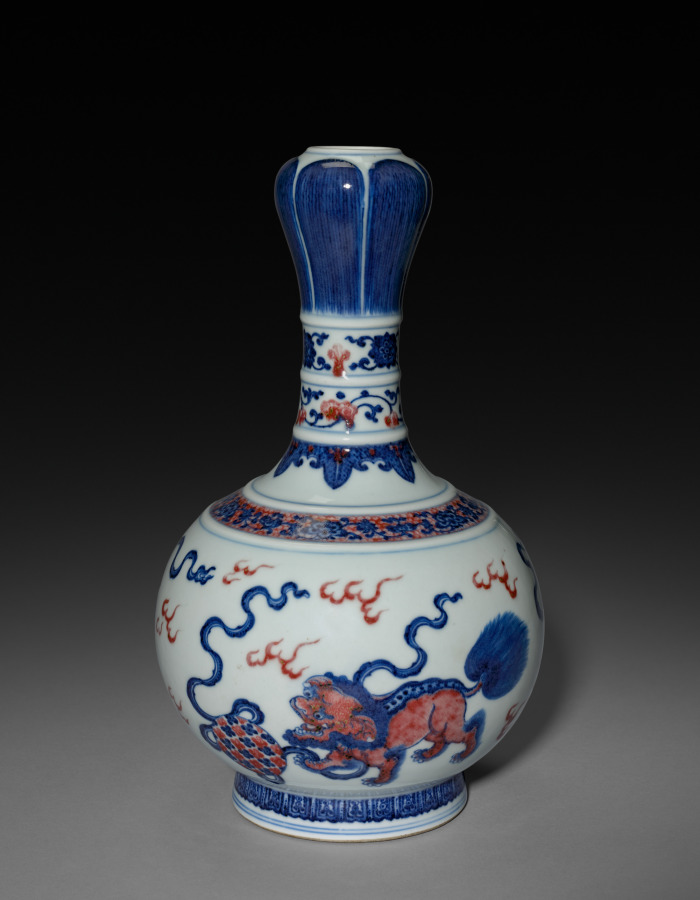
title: Bottle-shaped Vase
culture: China, Qing dynasty (1644–1911), Qianlong reign (1736–95)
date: 1736–95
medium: porcelain with underglaze decoration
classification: Ceramic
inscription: 大清乾隆年制